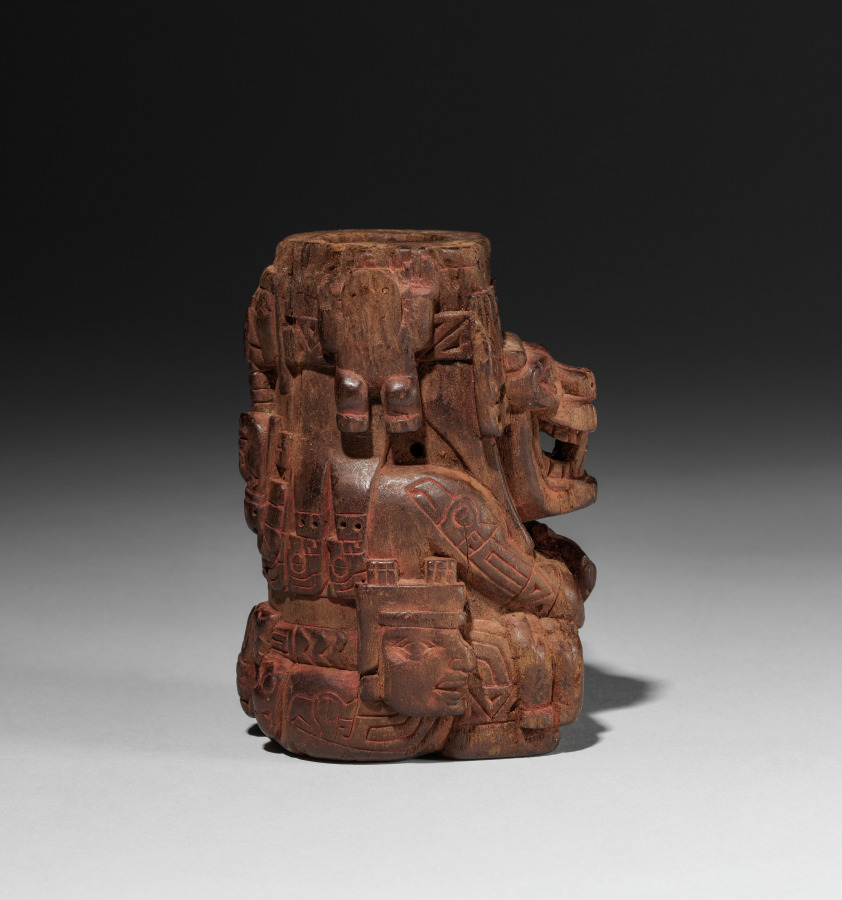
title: Container in the form of a Sacrificer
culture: Peru, Middle Horizon, Wari Culture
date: 770–890 (radiocarbon date, 95% probability)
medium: wood and red pigment (cinnabar)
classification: Wood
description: This container assumes the shape of a magnificent, feline-headed, supernatural sacrificer who draws a knife across the throat of the human it holds in its lap. Severed human heads hang from the feline's belt and dangle by the trachea at the back of its headdress. Sacrifice had a place in Wari religious practice, probably as an unusual and exceptionally precious offering made to entice the benevolence of cosmic forces. Indeed, colonial-period Andean people believed that death was a prerequisite for the renewal of the world.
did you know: Traces of cinnabar, a toxic mercuric sulfide, are visible on the container's surface.